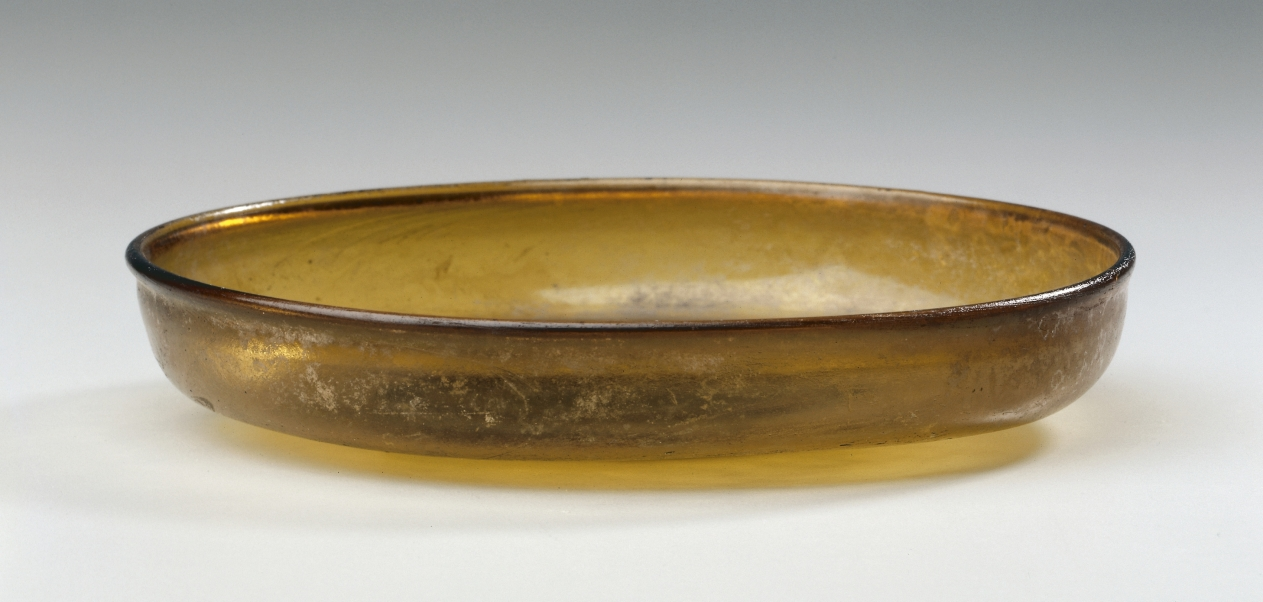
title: Saucer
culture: Eastern Mediterranean, Roman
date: 300s CE or later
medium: glass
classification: Glass